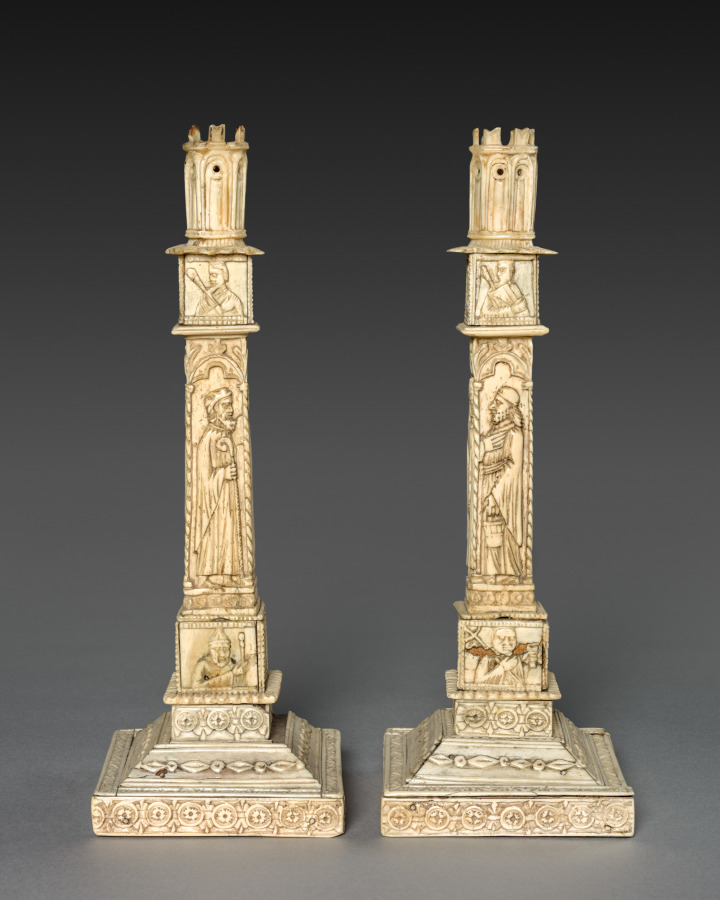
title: Candlestick Pair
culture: Italy, 15th century style (possibly 19th-early 20th century)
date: 1800s - early 1900s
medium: ivory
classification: Ivory